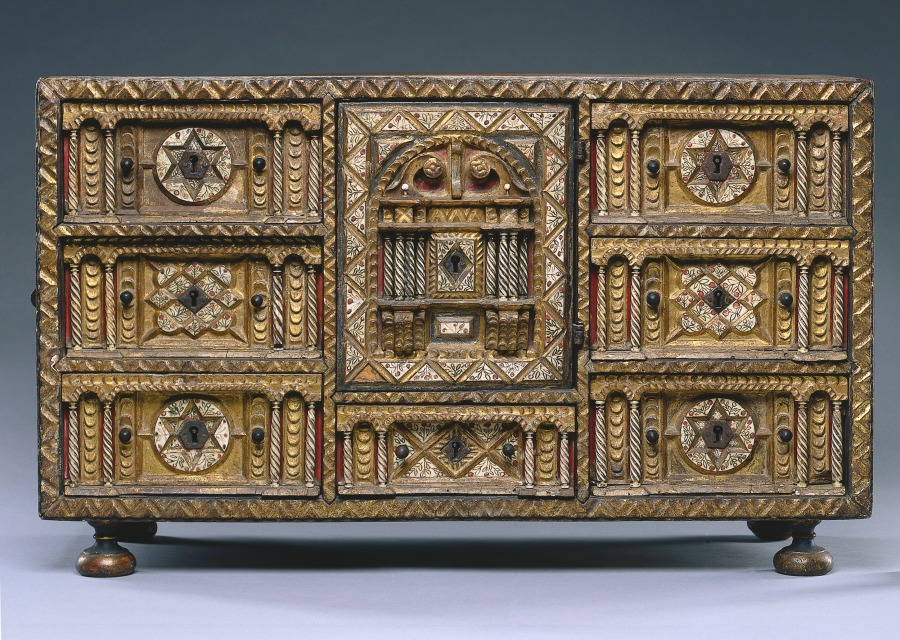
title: Chest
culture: Spain, Colonial, late 17th Century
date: late 1600s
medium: turned and joined wood, gilded and painted red with applied bone columns and bone inlays, wrought iron hardward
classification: Furniture and woodwork